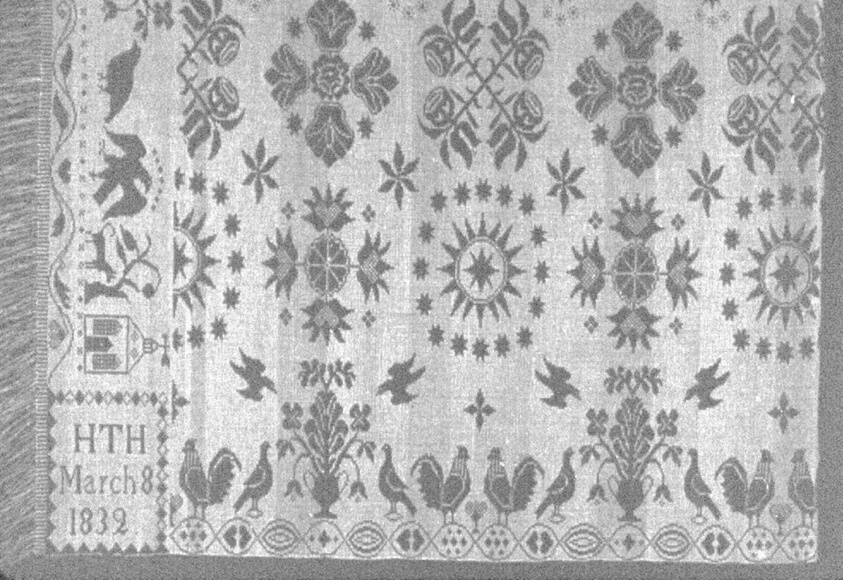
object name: Textile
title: Coverlet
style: 19th century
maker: Attributed to David D. Haring (American, 1800–1889); United States, New Jersey, Bergen County, West Norwood or New York, Rockland County, Tappan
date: 1832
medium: Cotton and wool, plain weave double cloth; woven on loom with Jacquard attachment; two loom widths joined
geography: United States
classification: coverlet; weaving; weaving - coverlet; textile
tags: birds, vines, vase, roosters, foliage, flowers, eagles, dates, buildings, bird, coverlet